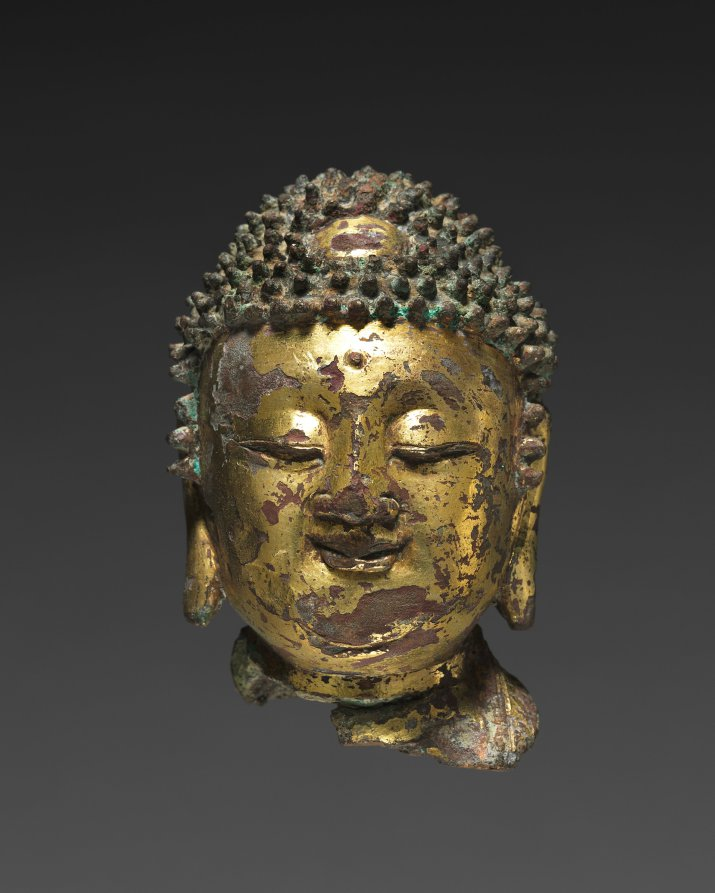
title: Head of Buddha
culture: Korea, Goryeo dynasty (918–1392)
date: 900s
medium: gilt bronze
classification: Sculpture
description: While large Buddhist statues were made mostly in stone during the Goryeo period (918–1392), small ones were made in gilt bronze, as a portable object of devotion by traveling Buddhist monks.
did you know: A gentle smile crossing the Buddha's face here is a sign of compassion.